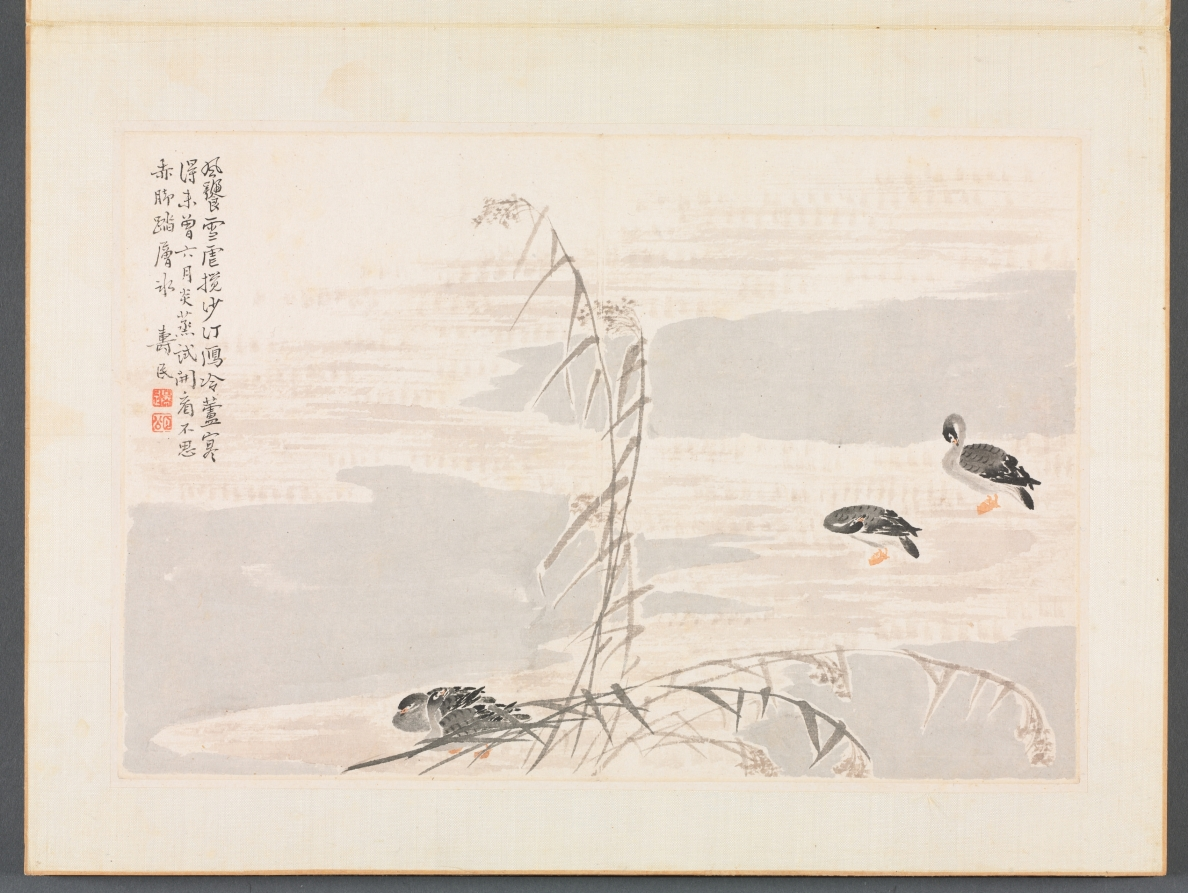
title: Album of Calligraphy and Paintings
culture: China, Qing dynasty (1644-1911)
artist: Bian Shoumin (Chinese, 1684–1752)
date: first half of the 1700s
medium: album leaf; ink and color on paper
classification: Painting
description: The artist Bian Shoumin is known for his depiction of wild geese, water, and reeds. The migrant birds in autumn and winter evoked, in the minds of the Chinese intelligentsia, a time of parting and sorrow.